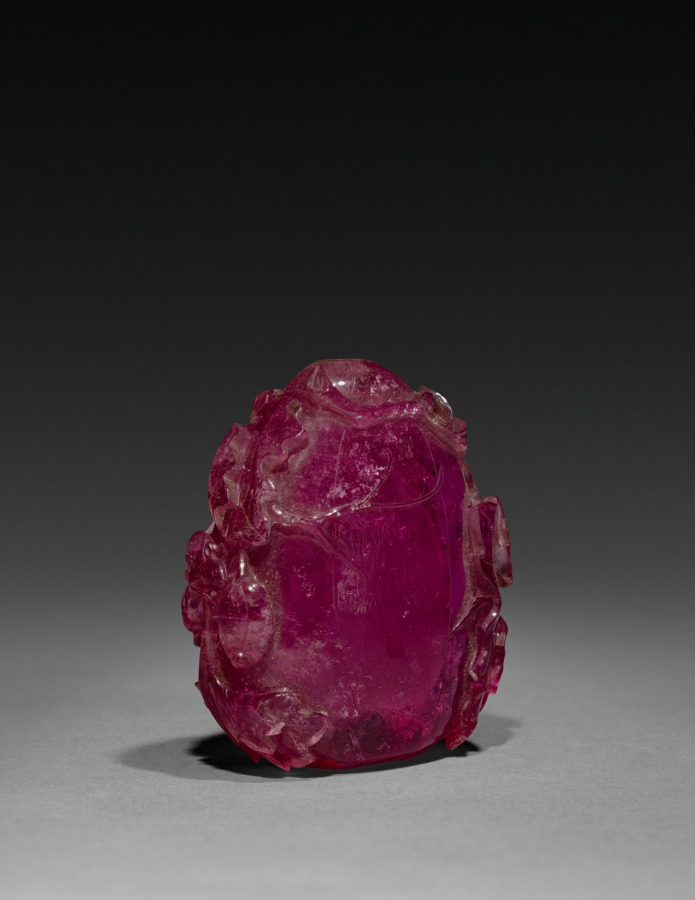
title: Snuff Bottle with Stopper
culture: China, Qing dynasty (1644-1911)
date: 1800s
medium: rose quartz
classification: Stone